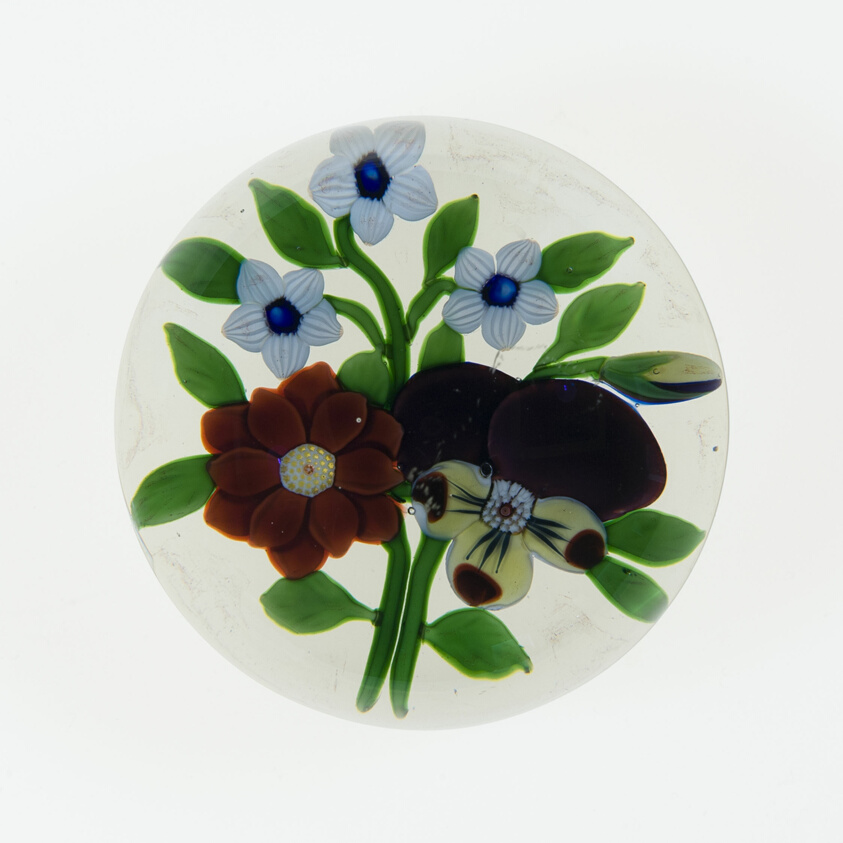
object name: Glass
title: Paperweight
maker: Baccarat Glassworks (Cristalleries de Baccarat); Lorraine, France, founded 1764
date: c. 1848–55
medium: Glass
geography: Lunéville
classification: paperweight; lampwork; european decorative arts; glass